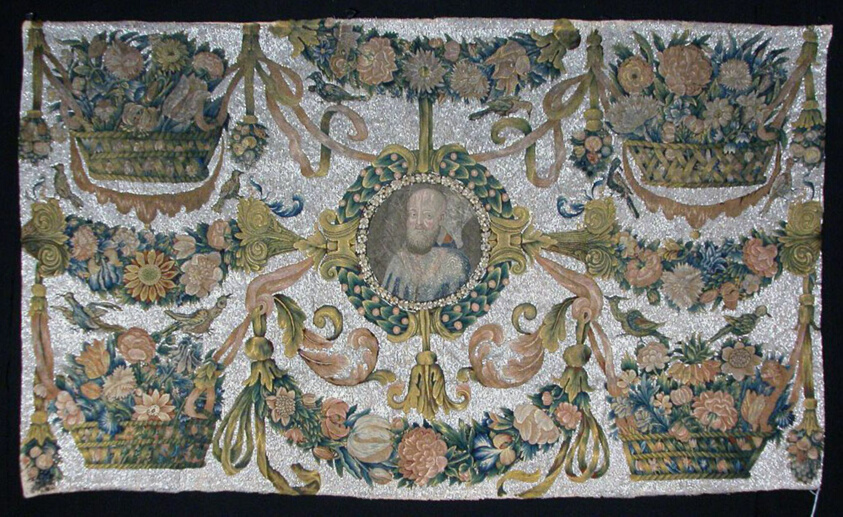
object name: Textile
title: Table Frontal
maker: Italy, Venice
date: 17th century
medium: Linen, plain weave; embroidered with wool and silk in satin padded satin, split and stem stitches; French knots, laidwork and couching; beaded with linen threads and glass beads; painted details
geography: Italy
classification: textile; needlework (visual works)